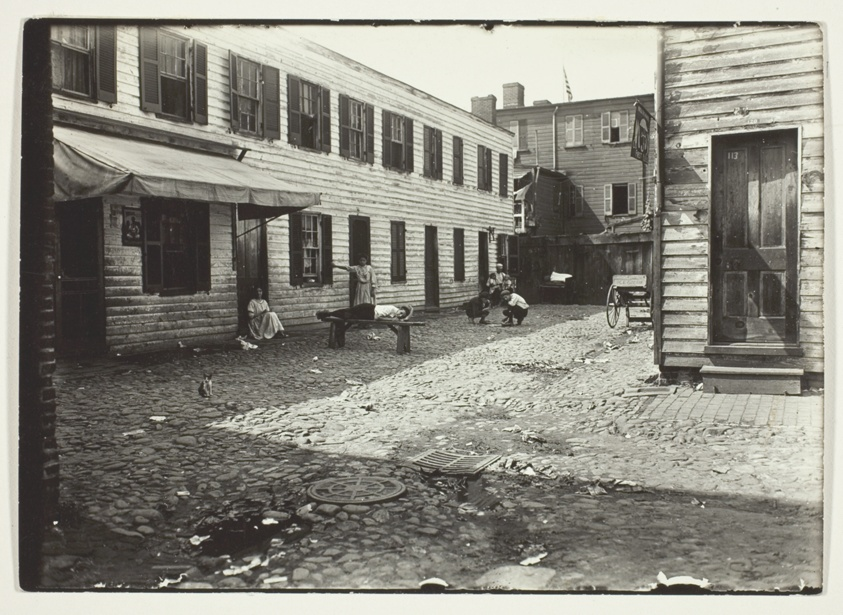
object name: Photograph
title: Negro Alley Housing Whites, Washington, D.C.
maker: Lewis Wickes Hine (American, 1874–1940)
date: 1909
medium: Gelatin silver print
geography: United States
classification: gelatin silver (developing-out-paper) pr; photographic process; photography; photograph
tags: Collected by Hugh Edwards